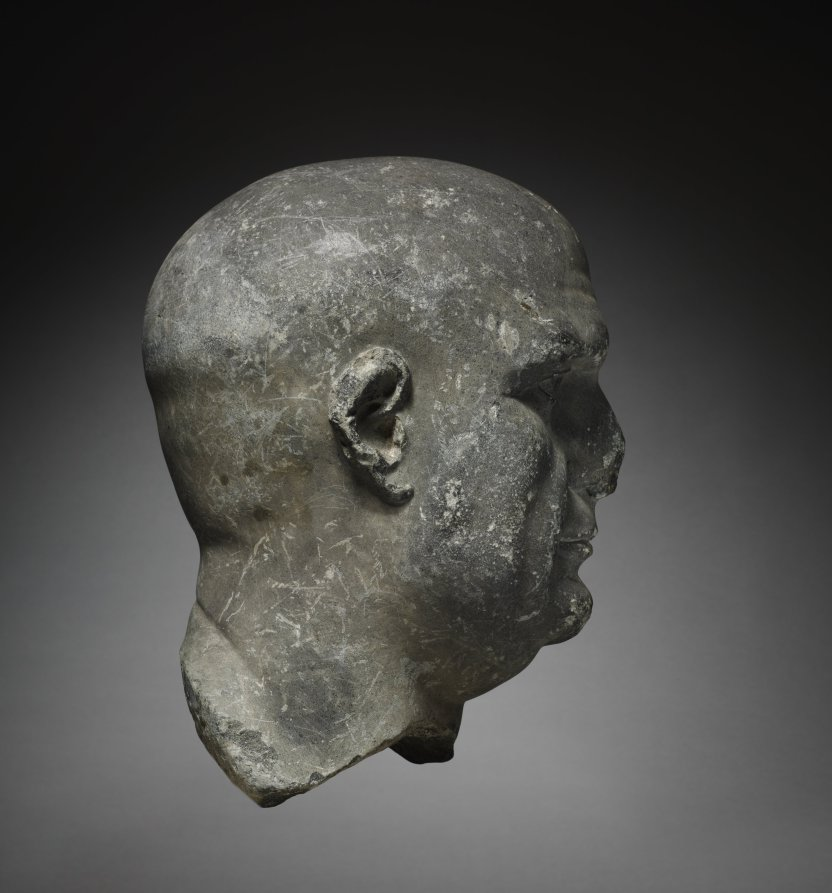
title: Portrait Head of a Priest of Isis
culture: Italy, Roman style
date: 100–200 CE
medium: limestone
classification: Forgery